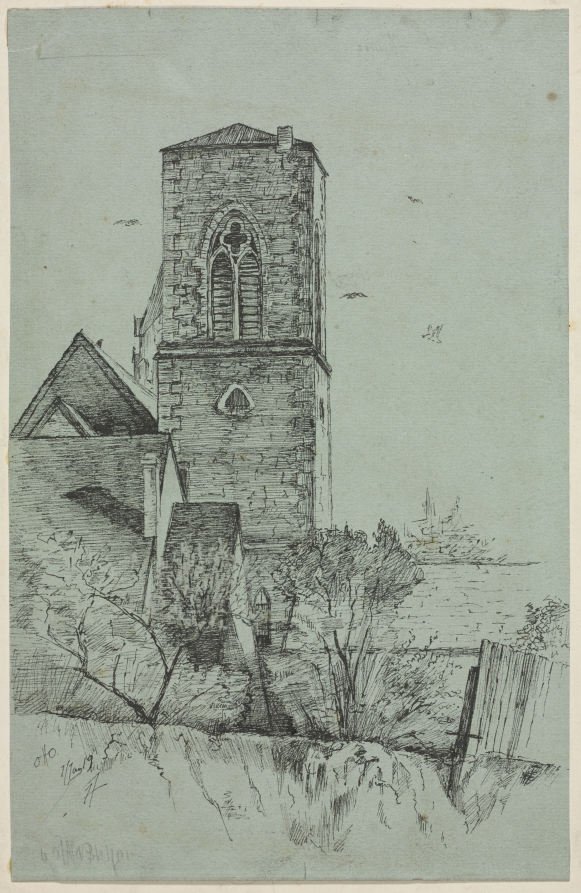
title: Tower of the Chimes, Old Trinity, Cleveland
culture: America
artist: Otto H. Bacher (American, 1856–1909)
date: c. 1870–1909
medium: Drawing on blue paper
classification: Drawing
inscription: Signed, "Otto, May 19."